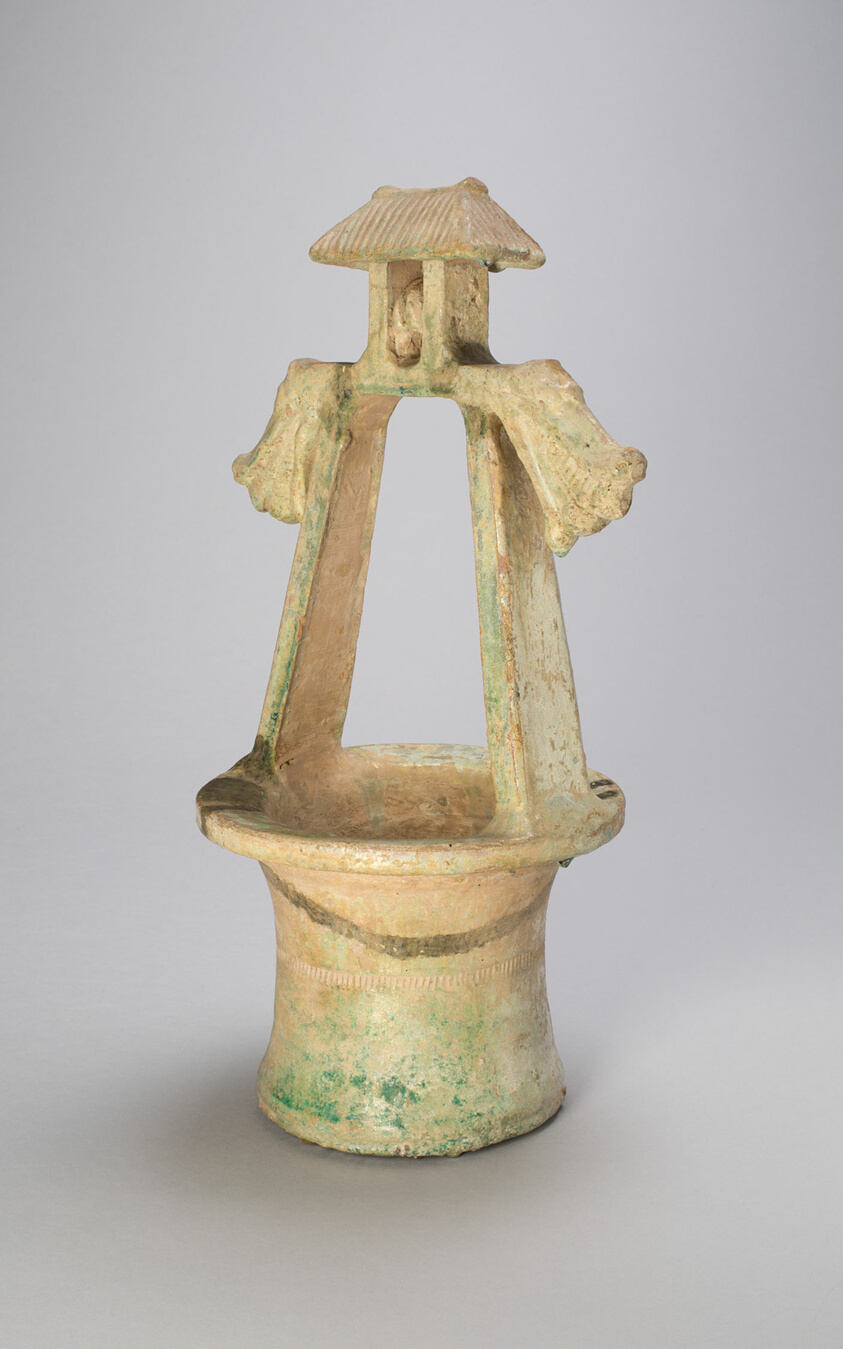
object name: Decorative Arts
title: Wellhead with Dragon Heads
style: Chinese (culture or style)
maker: China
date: Eastern Han dynasty (A.D. 25–220)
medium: Earthenware with green lead glaze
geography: China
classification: ceramics; asian art; decorative arts